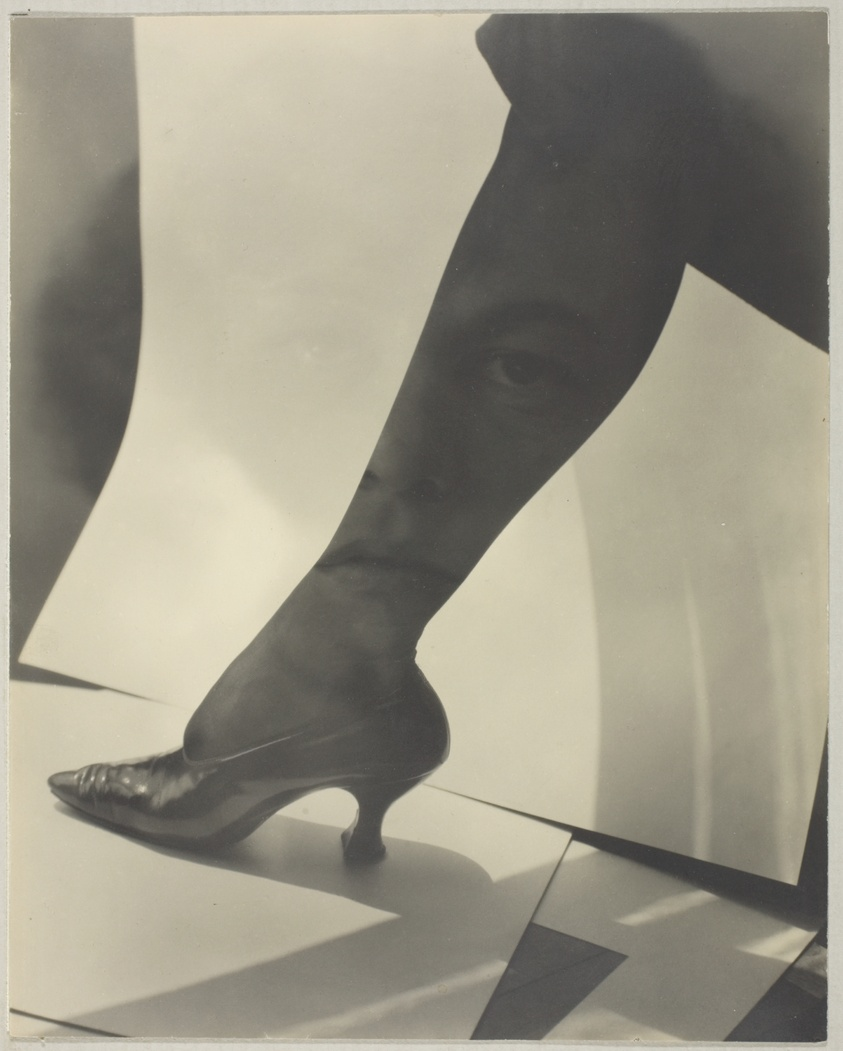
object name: Photograph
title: Dorothy True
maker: Alfred Stieglitz (American, 1864–1946)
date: 1919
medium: Gelatin silver print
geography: United States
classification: gelatin silver (developing-out-paper) pr; photographic process; photography; photograph